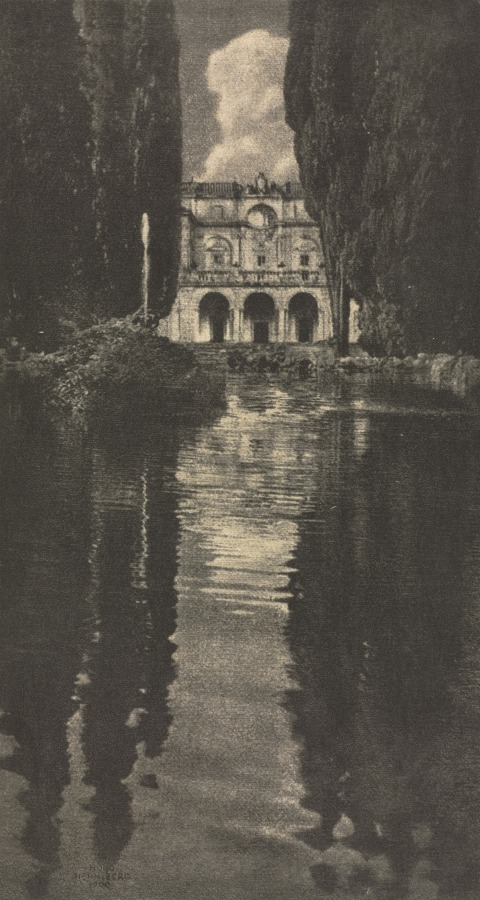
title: Camera Work: Villa Falconieri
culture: Austria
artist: Hugo Henneberg (Austrian, 1863–1918)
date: 1906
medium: photogravure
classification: Bound Volume